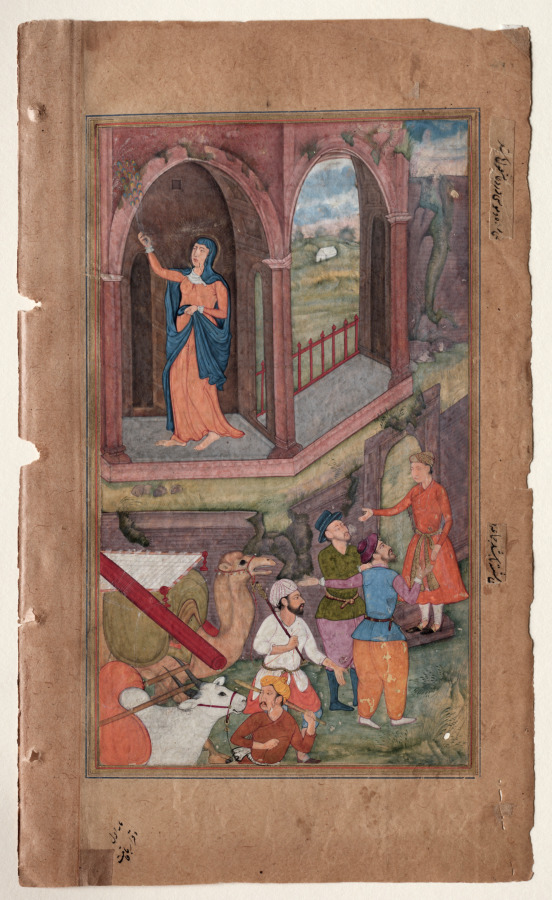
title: The place of Jesus’s birth (folio 25 recto), from a Mirror of Holiness (Mir’at al-quds) of Father Jerome Xavier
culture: Mughal India, Allahabad, made for Prince Salim (1569–1627)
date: 1602–4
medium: Gum tempera, ink, and gold on paper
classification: Manuscript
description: Instead of a stable, the artist has interpreted the place of Jesus’s birth as an abandoned ruin. Mary is cleaning it with a peacock-feather whisk, while Joseph negotiates with a man dressed in full Mughal attire at the doorway. The camel is laden with belongings and an Indian-style bed.